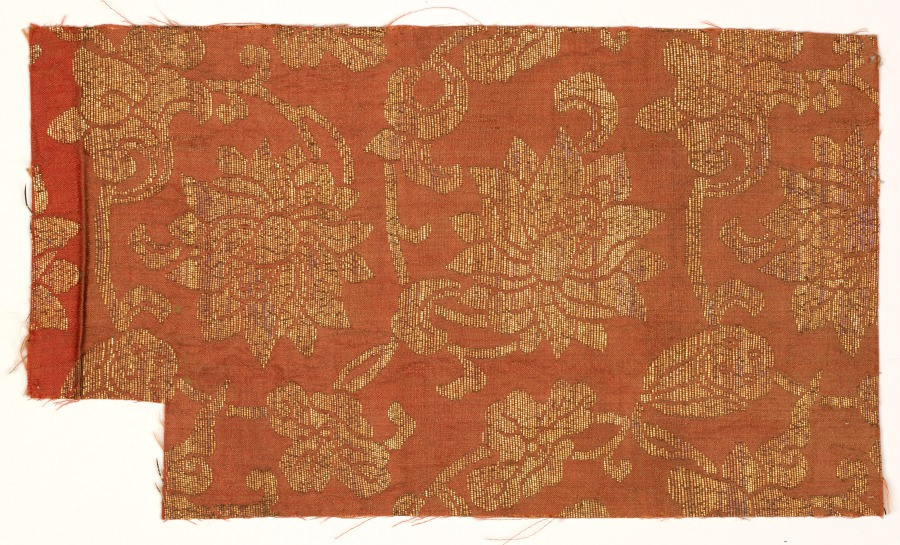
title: Textile Fragment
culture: Japan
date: 1700s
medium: silk: satin weave with metal thread weft brocade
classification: Textile